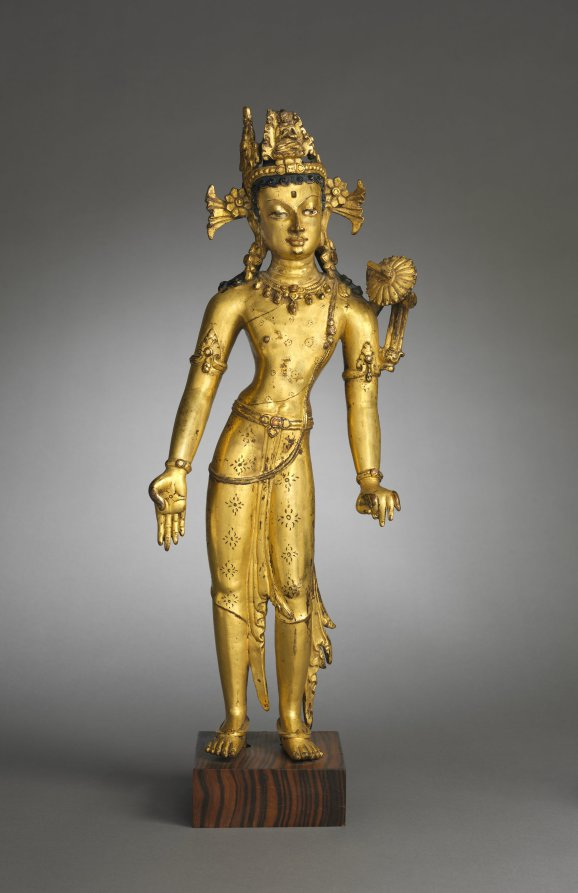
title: Bodhisattva of Wisdom (Manjushri)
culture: Nepal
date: 1400s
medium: gilded copper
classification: Sculpture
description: The youthful, princely form of Manjushri can be identified by the horizontal book on the lotus over his left shoulder. The book refers to the Buddhist teachings of ultimate knowledge (Prajnaparamita), and this bodhisattva is the male embodiment of the wisdom gained from understanding them. Manjushri is of special importance for Buddhists of Nepal, called Newari, who credit him with draining the water from Kathmandu Valley.